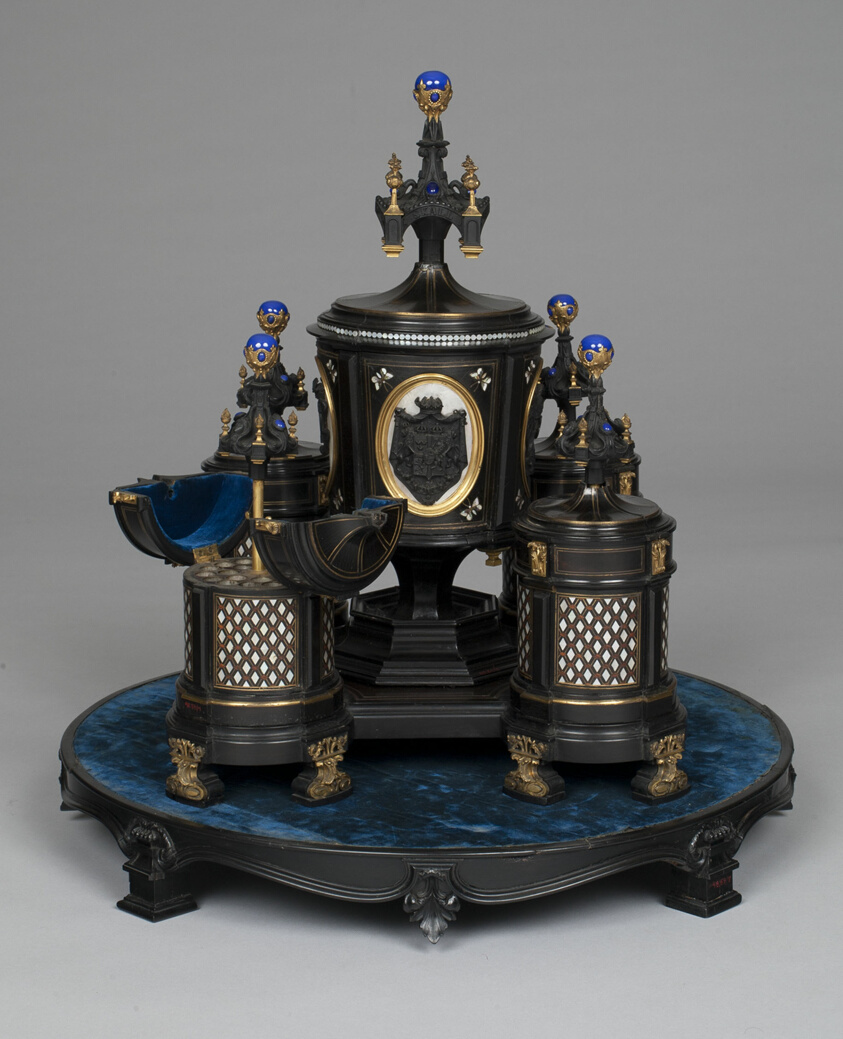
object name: Furniture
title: Cigar and Tobacco Stand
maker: Stockholm, Sweden; Attributed to Adolf Lindberg (Swedish, 1839-1916)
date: 1859/72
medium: Ebony and other woods, silver liner, decorations of mother–of–pearl, gilded brass, blue glass, and blue velvet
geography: Sweden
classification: stand; furniture; european decorative arts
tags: furniture